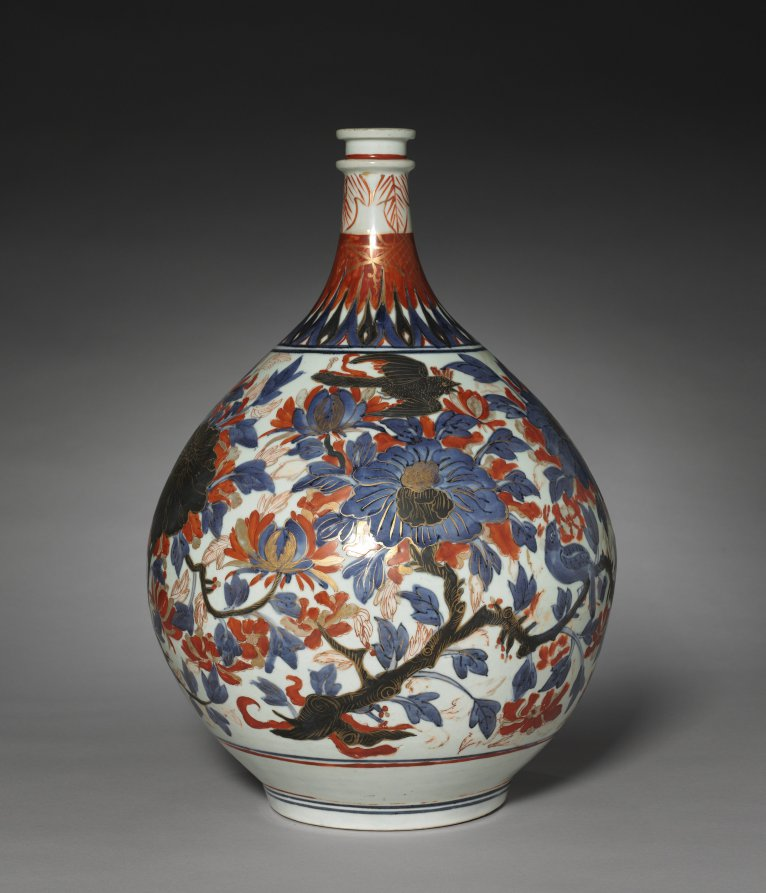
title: Apothecary's Bottle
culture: Japan, Edo period (1615–1868)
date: 1670s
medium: porcelain with underglaze blue and overglaze color enamels (Hizen ware, Arita type)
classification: Ceramic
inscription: on bottom: "IC" (probably stands for Joannes Camphuys, 1634-1695).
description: The decoration of this white porcelain bottle was achieved through a multistep process. First, some decorative elements, like the deep blue forms, were applied with glaze and then fired. Enamels were brushed on to achieve the bright colors. This bottle was probably in the collection of Johannes Camphuys (1634-1695), who was in charge of the Dutch residential island of Deshima in Nagasaki harbor.